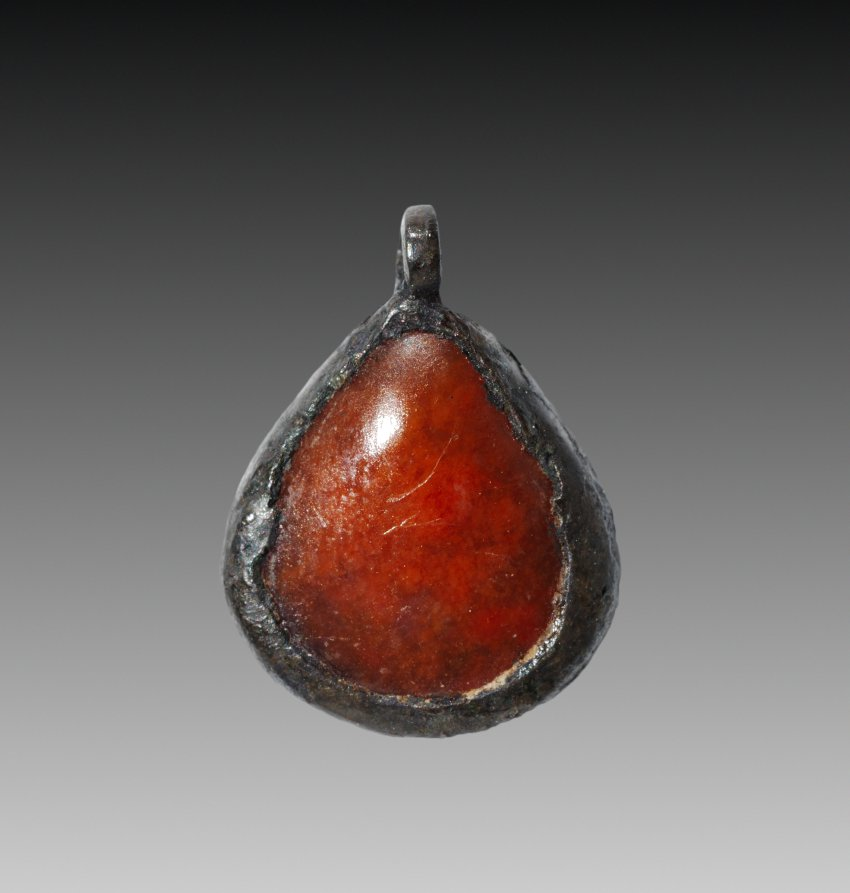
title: Oyster-Shell Pendant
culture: Egypt, Middle Kingdom (2040–1648 BCE), Dynasty 12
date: 1980–1801 BCE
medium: carnelian and silver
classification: Jewelry